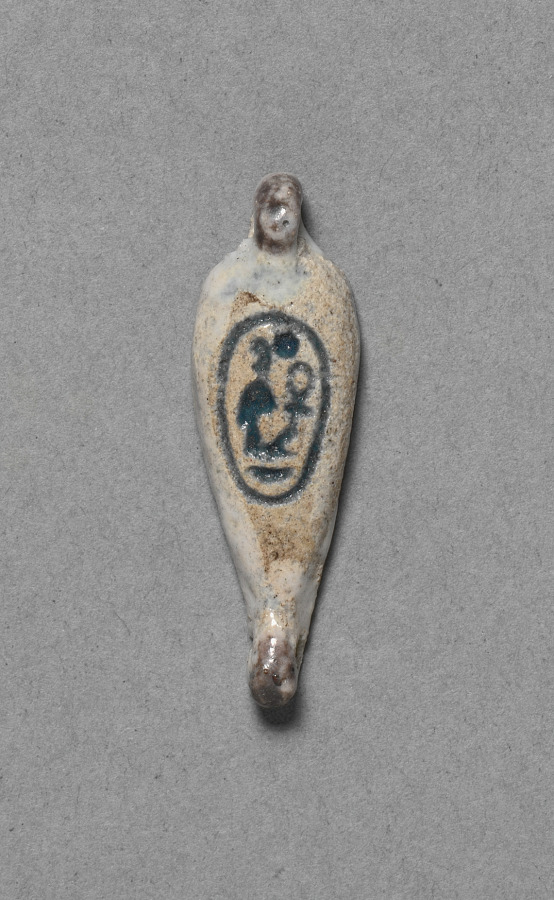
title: Petal-Shaped Bead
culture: Egypt, New Kingdom (1540–1069 BCE), Dynasty 18, reign of Amenhotep III (1390–1352 BCE)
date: c. 1391–1353 BCE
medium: faience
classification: Jewelry